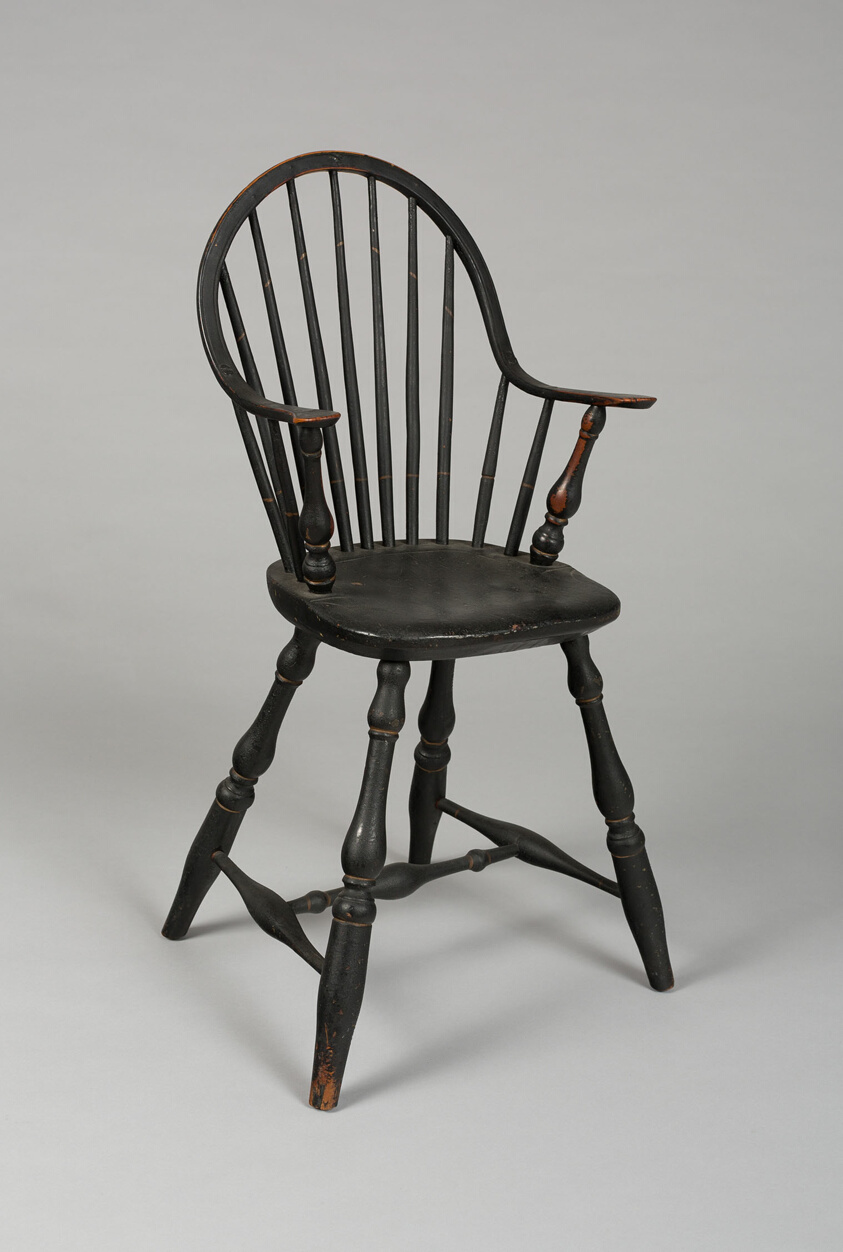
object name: Furniture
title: Windsor High Chair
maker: Artist unknown (American, 18th–19th century)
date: 1790–1800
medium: Maple, white pine, and hickory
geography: United States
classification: seating; furniture; american decorative arts; american arts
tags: furniture